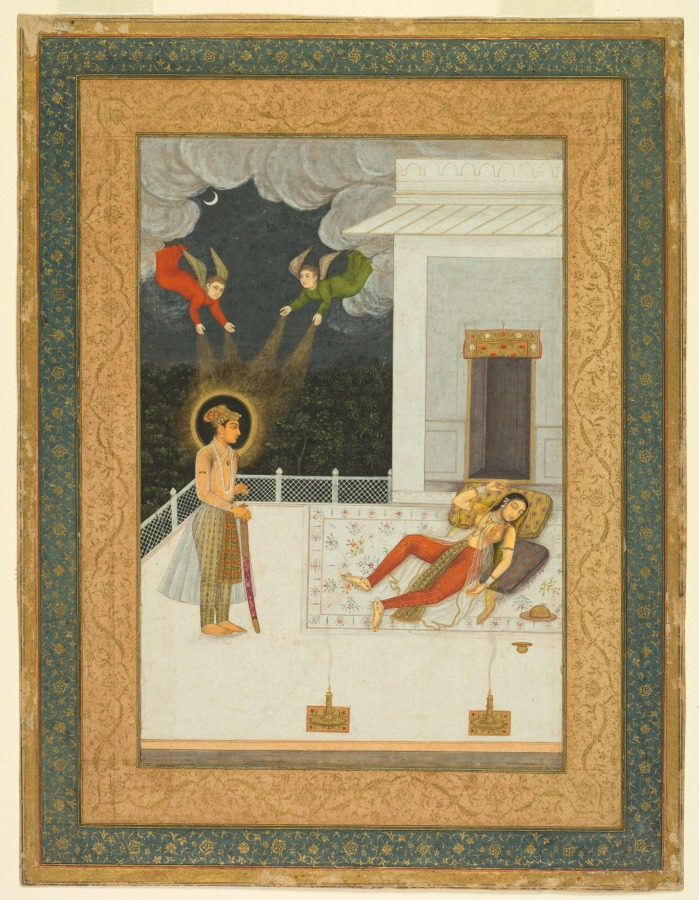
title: The dream of Zulaykha, from the Amber Album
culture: India, Mughal, 17th century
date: c. 1670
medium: Gum tempera, ink, and gold on paper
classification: Painting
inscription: verso: Central blank panel and similar borders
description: In Islamic texts, as in the Hebrew and Christian Old Testament traditions, Zulaykha is the unnamed wife of Potiphar, a wealthy Egyptian. This scene is from a popular Persian poem that recounts the story of Joseph and Zulaykha as a mystical romance, and describes her visionary dreams of a beautiful lover. In this painting we see the luxuriously dressed Zulaykha asleep on a terrace, reclining on ornate pillows as a vision of her love, Joseph, appears before her. He is illuminated by radiant light cast down by angels emerging from the dark night clouds.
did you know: Joseph, the man of Zulaykha’s dreams, is dressed as a Mughal prince.